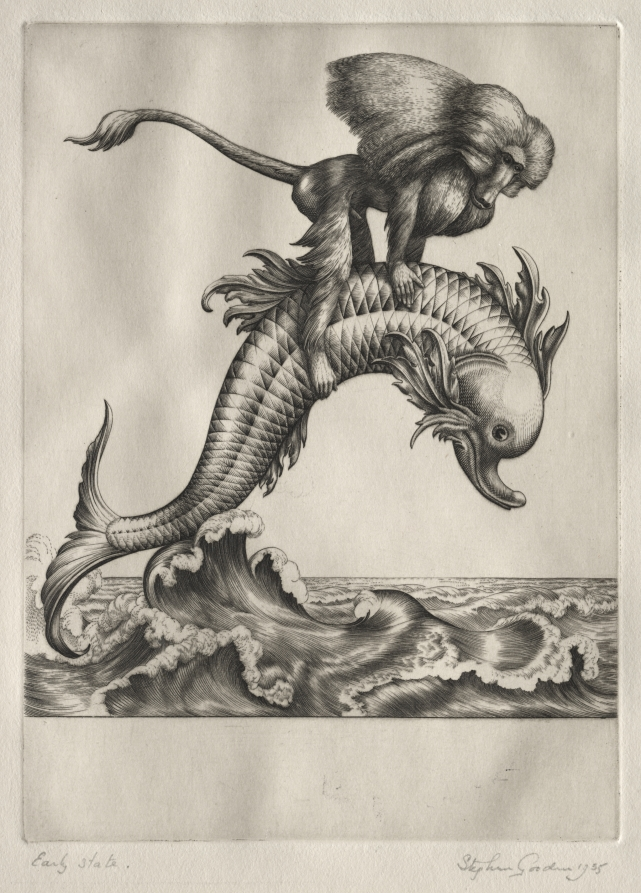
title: Aesop's Fables: An Ape and a Dolphin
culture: England, 20th century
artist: Stephen Gooden (British, 1892–1955)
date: 1935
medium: engraving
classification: Print